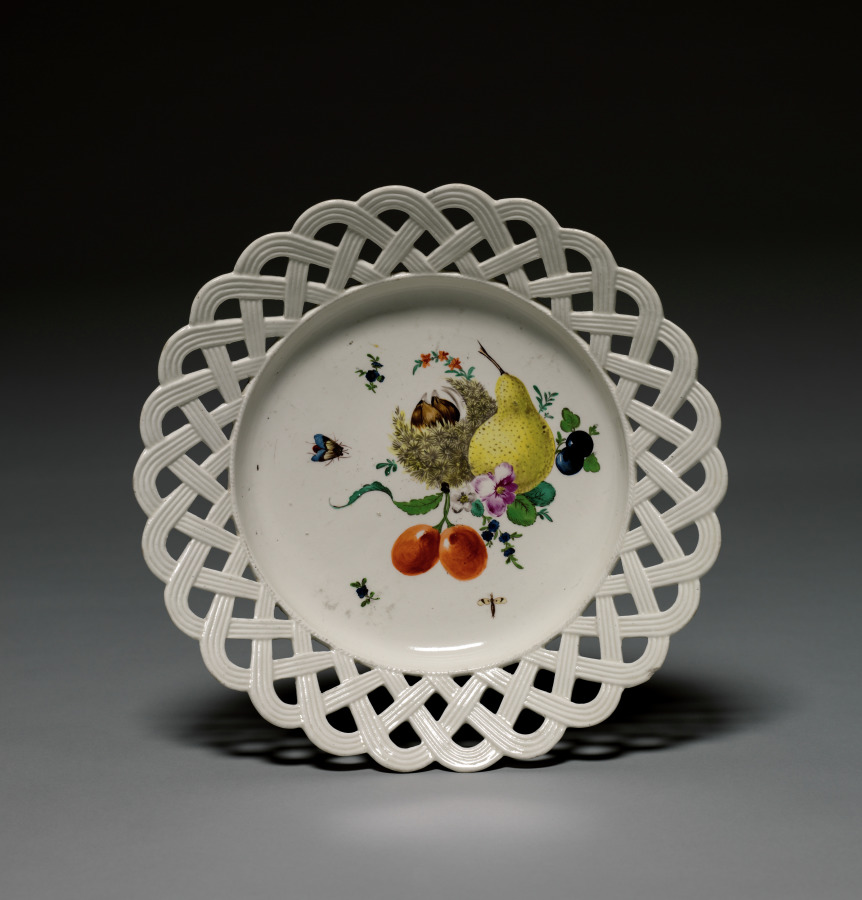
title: Plate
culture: Germany, 18th century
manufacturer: Frankenthal Porcelain Factory (German)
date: 1777–1799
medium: porcelain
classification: Ceramic